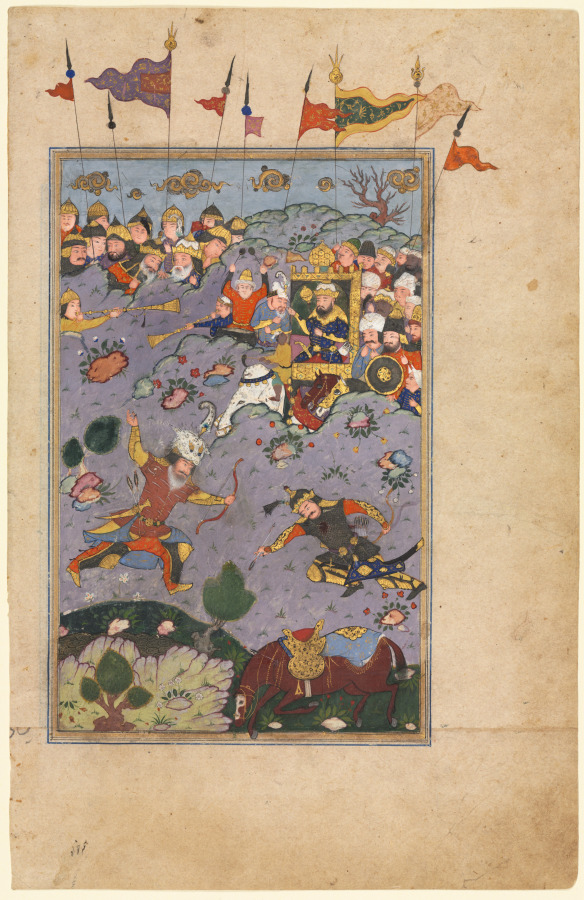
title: Rustam meets the challenge of Ashkabus, from a Shah-nama (Book of Kings) of Firdausi (Persian, about 934–1020)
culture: Iran, Shiraz, Safavid period (1501-1722)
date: c. 1590–1600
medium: Opaque watercolor, ink, and gold on paper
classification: Manuscript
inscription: Script: Nasta'liq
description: Iran was losing a battle against Turan and the armies of its assembled allies from India and China. The hero Rustam arrived to pull the Iranian army back from the brink of destruction, slaying the enemy warrior Ashkabus on foot while allowing his horse Rakhsh to rest after a long, hard journey. The vast number of armies involved in the battle is indicated by the many banners that extend beyond the illustration’s top border. This painting was probably produced at Shiraz, one of Iran’s major cultural centers, far to the south of the Safavid capital of Tabriz. Artists and works of art moved back and forth steadily between Shiraz and the Deccan in southwestern India during the 1500s and 1600s. The section of the Shah-nama on the recto is famous for the clever conversational repartee between Rustam and his opponent Ashkabus. When Ashkabus remarked that in choosing not to ride a horse Rustam had signed his own death warrant, Rustam retorted, “Would it be the case then that in your country . . . lions, tigers, and crocodiles [all] ride on horses to battle?” Rustam then brought down the horse of Ashkabus with a single arrow; his next arrow pierced Ashkabus in the chest.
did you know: The enemy ruler of China sits in a howdah on the back of a white elephant.